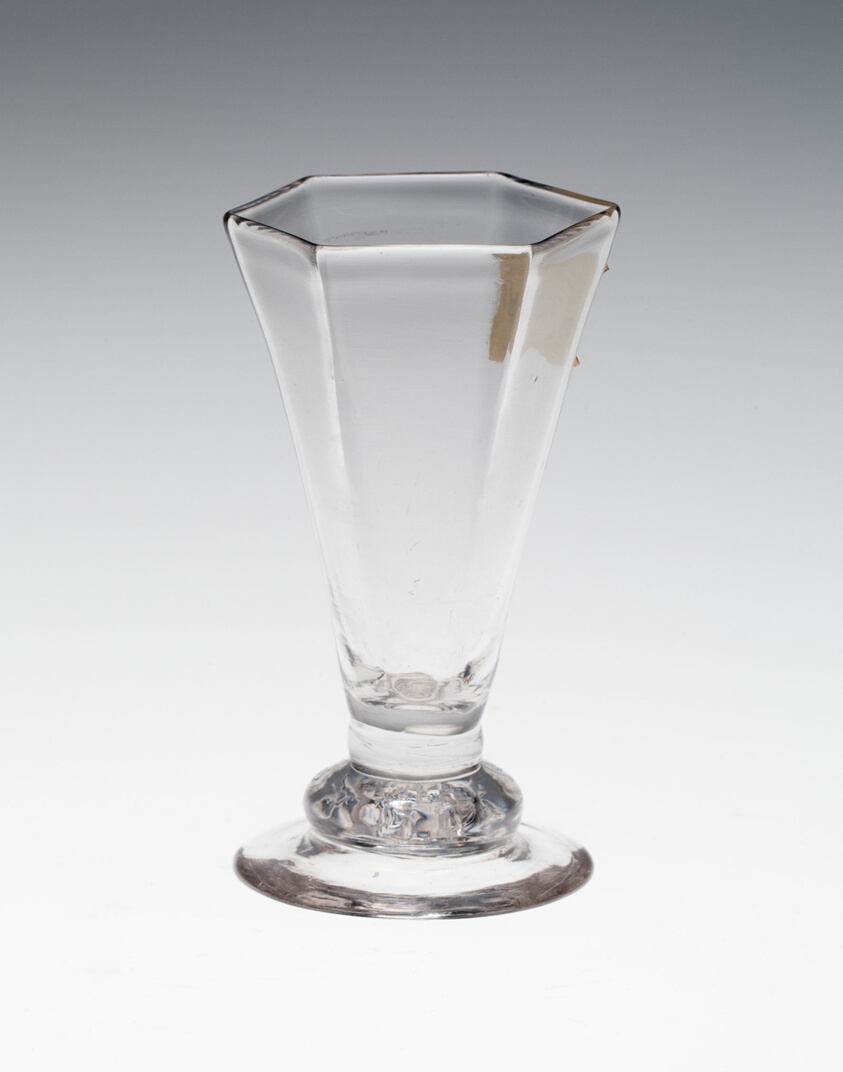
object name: Glass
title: Cordial or Sweetmeat Glass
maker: England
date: c. 1780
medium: Glass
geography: England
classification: glass; european decorative arts